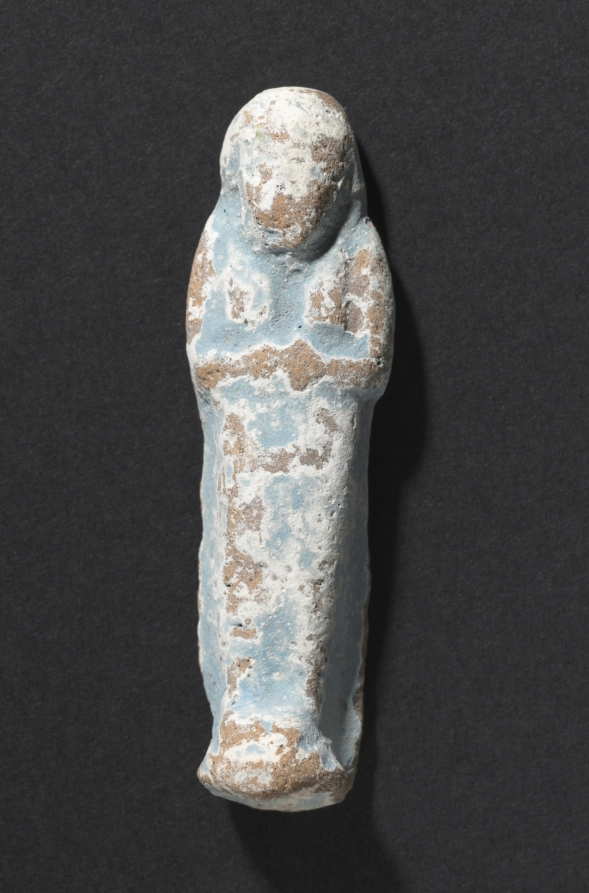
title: Shawabty of Ditamenpaankh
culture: Egypt, Late period (715–332 BCE), Dynasty 25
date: 715–656 BCE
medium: terracotta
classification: Funerary Equipment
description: High demand for shawabtys in the Late Period, a time when as many as 400 or more shawabtys were placed in the tomb with the deceased, gave rise to a specialized container for storing them: the shawabty box. This example is inscribed for the lady of the house, Ditamenpaankh, and was probably one of a pair originally made for her. The single-masted boat on the box's lid is perhaps an allusion to the pilgrimage of the deceased to the holy city of Abydos, the cult city of Osiris, king of the dead. The shawabtys inside are crude, mass-produced examples cast in an open mold. Made of terracotta, their blue paint imitates more costly shawabtys made of faience. As for the shawabty spell, it has been removed from its traditional location on the shawabty's front and relocated onto the sides of box, where it needed only to be written once, thus expediting production.